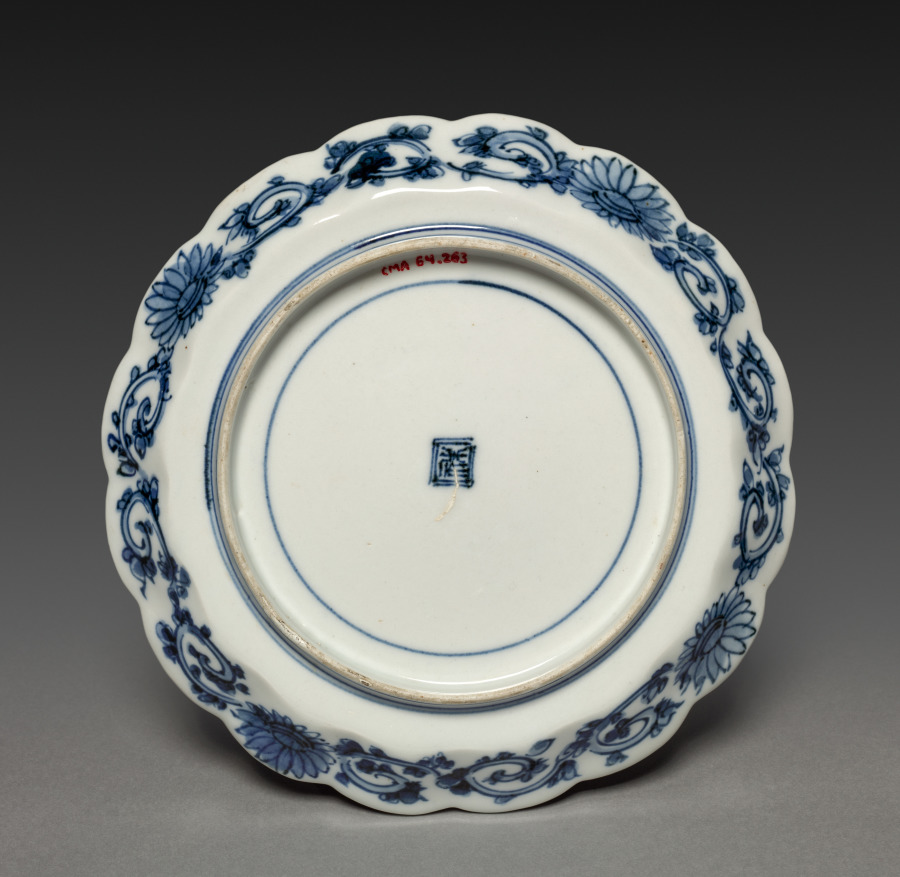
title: Dish with Singing Bird on a Rock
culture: Japan, Edo period (1615–1868)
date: 1700s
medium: porcelain with underglaze blue and overglaze color enamel (Hizen ware, Ko-Kutani style)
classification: Ceramic